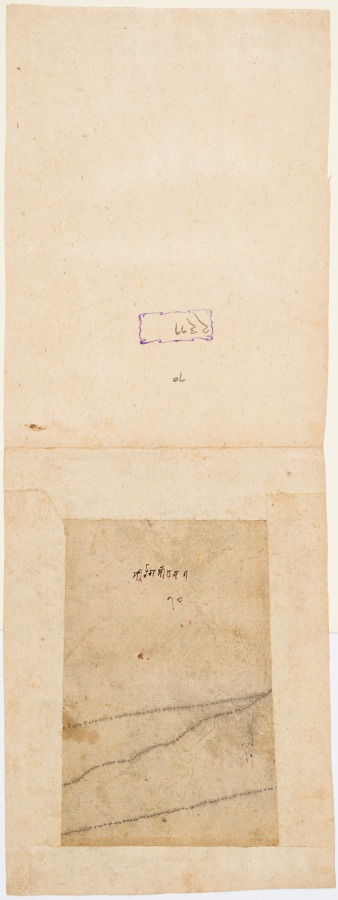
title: Sindhu (Saindhava) Ragaputra of Shri Raga, from a Ragamala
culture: Northern India, Pahari kingdoms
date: c. 1680–90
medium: gum tempera, ink, and gold on paper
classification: Painting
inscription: Verso: Ṭākrī inscription: śrī rāga saindhava 1. Ṭākrī numeral: 10.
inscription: Cover sheet: Stamp of the Mandi royal inventory with the number 2379 (?)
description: The hero launches into the saddle with vigor, as he embarks on a journey to meet his lover. He has tucked one end of his coat into his sash, so it will not be in the way. The horse’s mouth opens in a whinny, aligning with a poem that forms the basis of this image. Once part of a large series in the Mandi royal library, it is now widely dispersed. The name refers to the coastal region of Sindh in present-day Pakistan. The scene evokes the music of Sindh, which is well known for expressing emotional anguish of separation.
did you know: The warrior tucked the end of his tunic into his belt, showing the red lining.